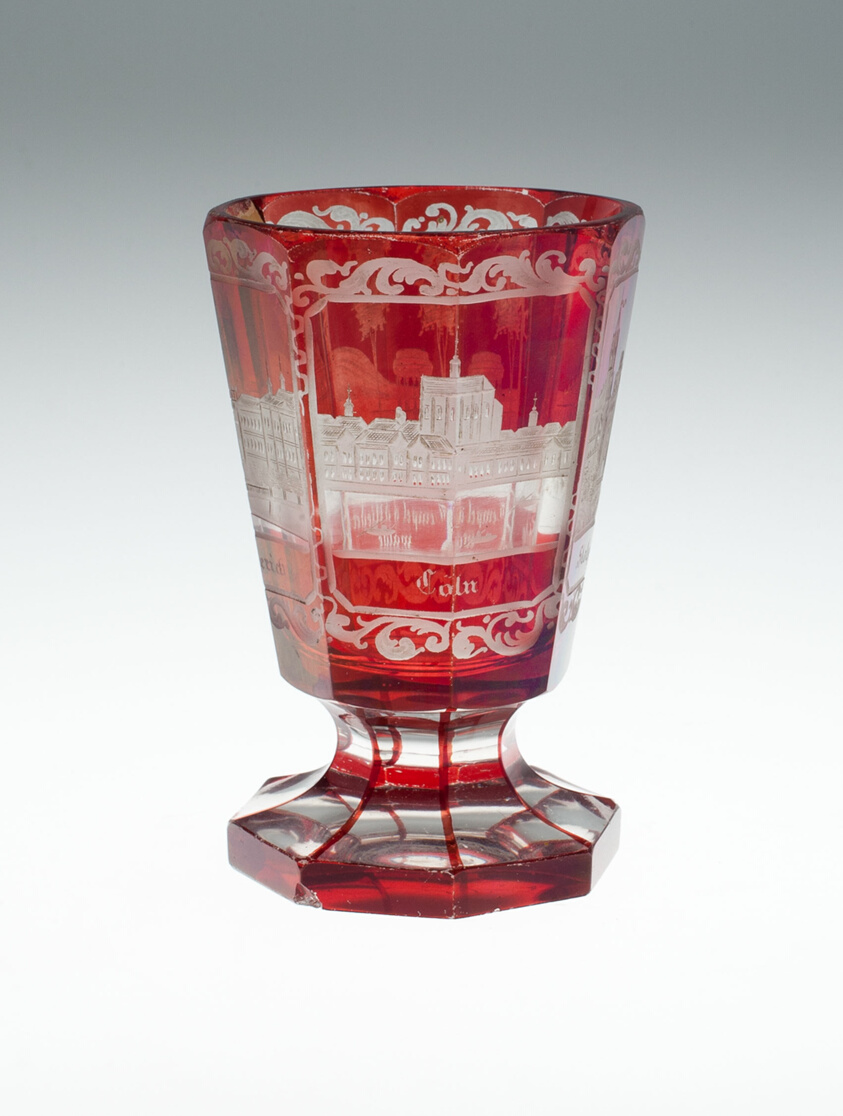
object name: Glass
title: Goblet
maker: Bohemia, Czech Republic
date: c. 1850/75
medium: Glass; blown, cut, stained red and engraved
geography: Bohemia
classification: drinking vessel; glass; european decorative arts